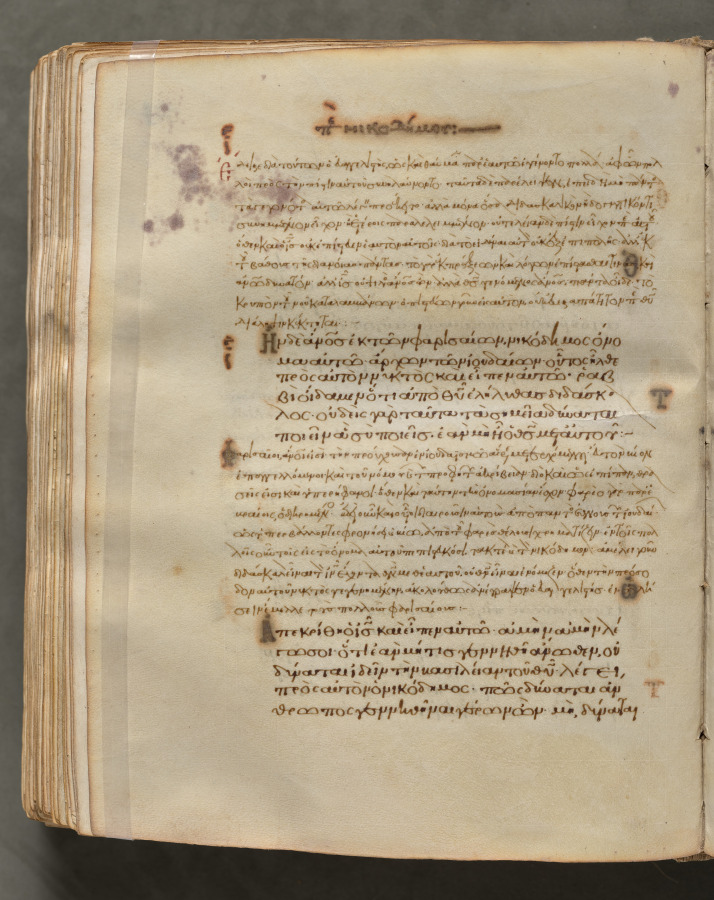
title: Text, folio 332 (verso), from a Gospel Book with Commentaries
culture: Byzantium, Constantinople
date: c. 1000–1100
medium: ink, tempera, and gold on vellum; leather binding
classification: Bound Volume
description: Each of the four gospels in this book opens on a page with brilliantly illuminated borders depicting the author of the text as well as birds—principally peacocks, symbols of the immortality of the soul—and fountains, representing the fountain of life and the salvation of the soul. This volume consists of 428 leaves with texts in Greek. Its level of sophistication suggests that it was probably written and decorated in a monastery in Constantinople.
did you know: Gospel books were carried in procession through Byzantine churches.